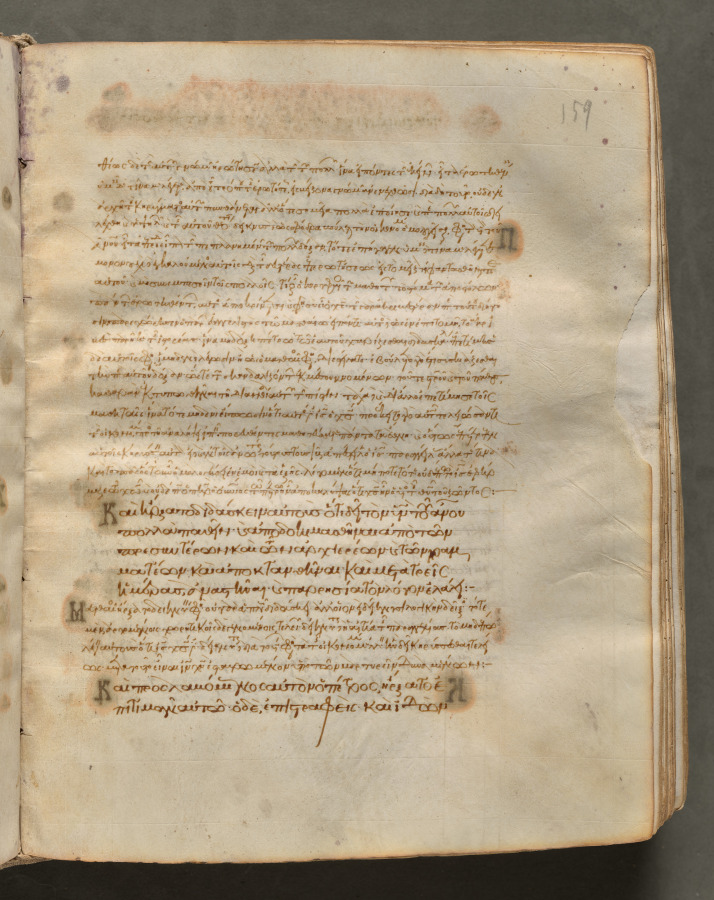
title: Text, folio 159 (recto), from a Gospel Book with Commentaries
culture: Byzantium, Constantinople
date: c. 1000–1100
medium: ink, tempera, and gold on vellum; leather binding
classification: Bound Volume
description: Each of the four gospels in this book opens on a page with brilliantly illuminated borders depicting the author of the text as well as birds-principally peacocks, symbols of the immortality of the soul-and fountains, representing the fountain of life and the salvation of the soul. This volume consists of 428 leaves with texts in Greek. Its level of sophistication suggests that it was probably written and decorated in a monastery in Constantinople.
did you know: Gospel Books were carried in procession through Byzantine churches.